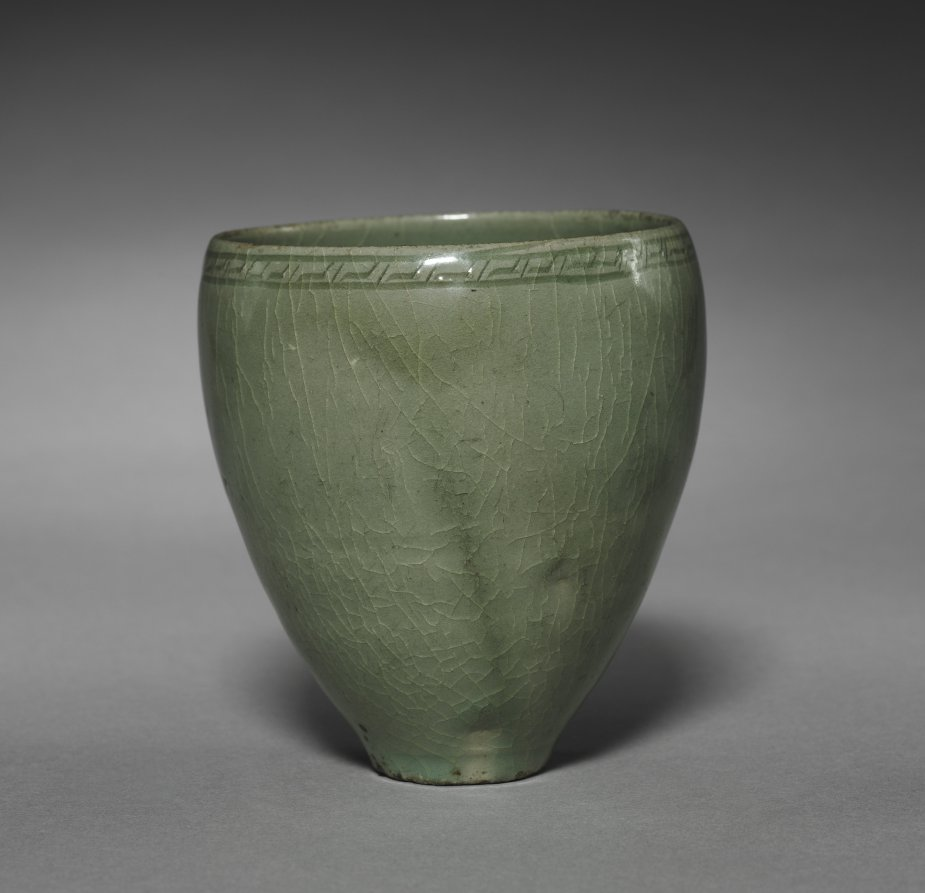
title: Cup with Incised Thunder Design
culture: Korea, Goryeo dynasty (918–1392)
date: 1100s-1200s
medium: celadon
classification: Ceramic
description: As early as the seventh century, the practice of drinking tea became an important part of elite culture in Korea. In enjoying teas, elites commissioned a variety of types of utensils and vessels including this delicate-looking cup, not only to make their tea-drinking experience more exciting, but also to show their refined taste.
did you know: This distinctively shaped cup with a pointy base is known to have originated from a practice of drinking wine on horseback.